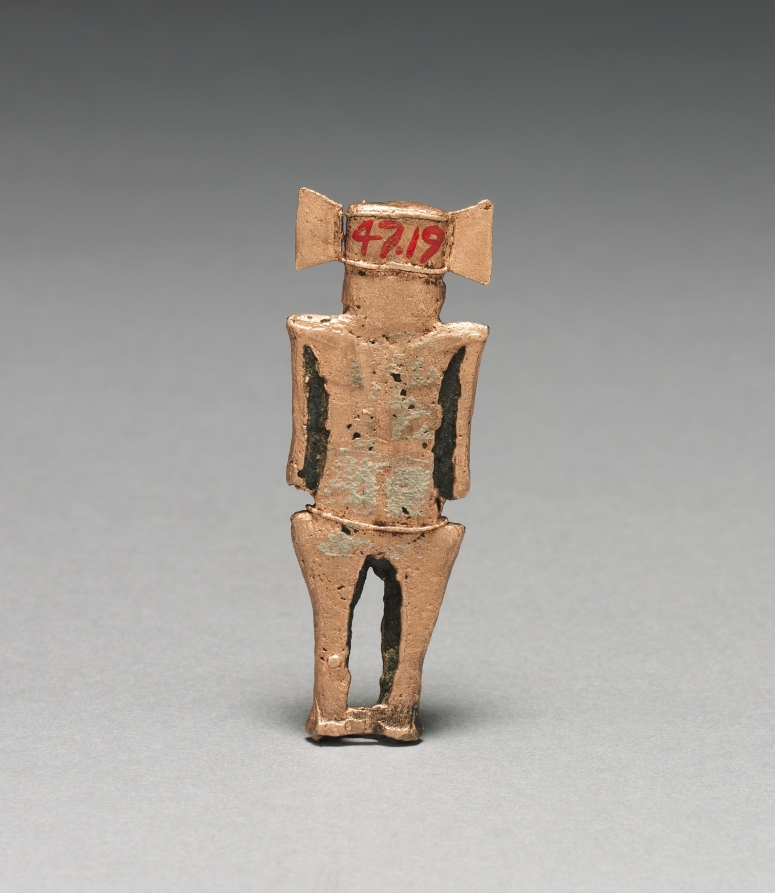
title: Tunjos (Votive Offering Figurine)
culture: Colombia, Muisca style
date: c. 900–1550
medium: cast gold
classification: Metalwork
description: Unlike the other gold ornaments in this gallery, tunjos were not worn; instead, they served as offerings that were deposited in sacred places, such as lagoons and caves. They often depict humans who hold something-here a container with a head (1947.22), a spear thrower (1947.19), and a bird-tipped (1957.25). The subject must have corresponded to a benefit being asked from the gods. Perhaps because they were not meant for display, tunjos were not finished after lost-wax casting. Flaws remain uncorrected, surfaces are unpolished, and gold that backed into the sprue (pouring channel) was left in place, creating the button-like form at the bottoms of 1947.24 and 1947.17, which were cast upside down.